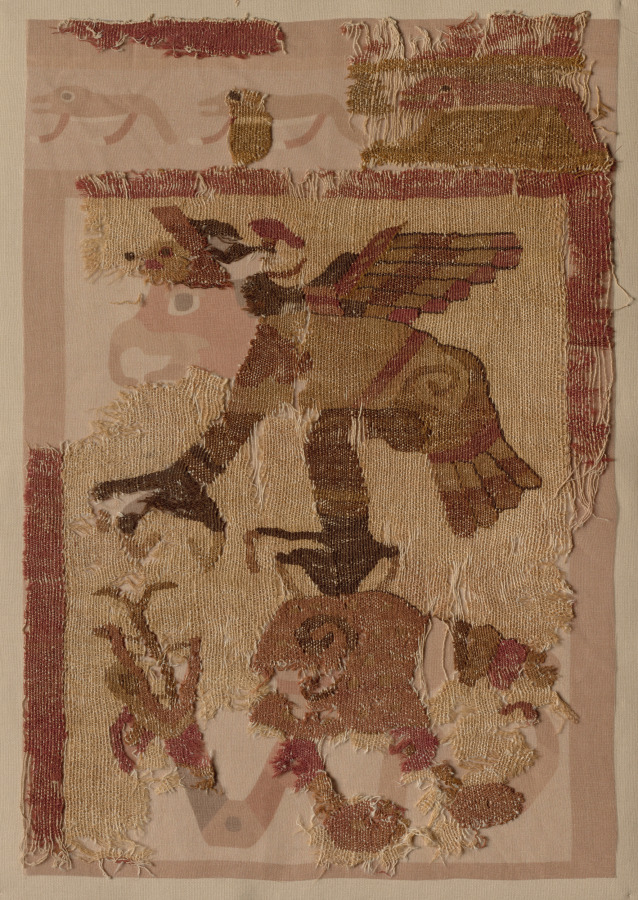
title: Textile Fragment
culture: Peru, Moche, north coast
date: c. 50–650 CE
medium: cotton and camelid fiber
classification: Textile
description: This fragment, one of several in the collection, is a rare survivor of catastrophic rains that destroyed much of the Moche textile legacy and may have helped to bring about the decline of Moche culture. It depicts a serpent and a snail beneath a hovering raptorial bird—perhaps a snail kite, a type of hawk named after its favored food. The size of the motifs implies that the original textile was large; a mantle (a shawl-like garment) or a hanging are among the possibilities.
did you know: This fragment is a rare survivor of floods that destroyed much of the Moche textile record.